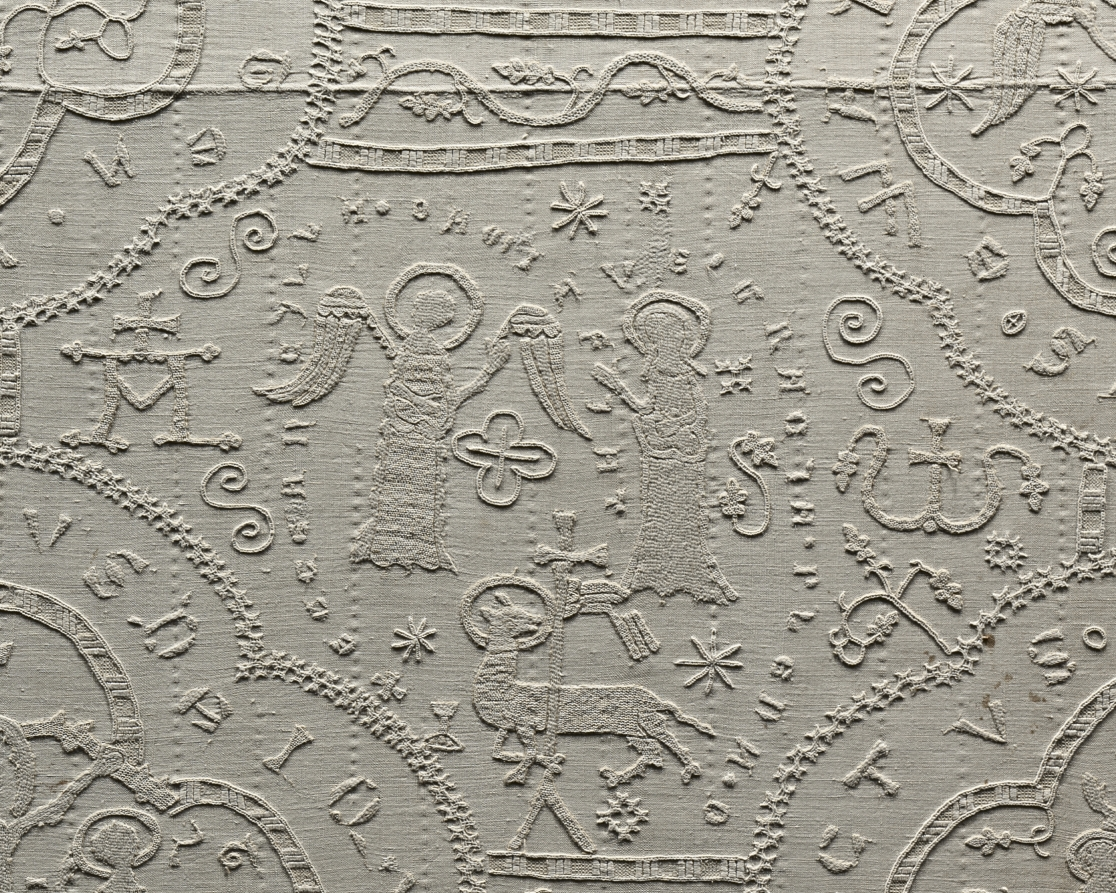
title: Altar Cloth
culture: Germany, Altenberg on the Lahn, Premonstratensian Convent, 14th century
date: c. 1350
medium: embroidery: linen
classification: Embroidery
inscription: various motifs enclosed in quatrefoils with identifying inscriptions in Gothic letters.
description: This large, embroidered altar cloth is one of the rarest, most important medieval church furnishings in existence. It was stitched by nuns in the Premonstratensian Convent in Altenberg on the Lahn River, north of Frankfurt, Germany, and was used to cover the church’s high altar in the weeks leading up to Easter. The cloth is an example of linen embroidery, a specialty of German nuns in the later Middle Ages. The Altenberg monastery church once had valuable furnishings; the high altar retable (a decorated frame with sculptures and paintings on the top of an altar) has survived, the main parts of which are now in the Städel Museum in Frankfurt, Germany.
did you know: When lit from behind, the previously hidden details emerge and the complex design becomes evident.